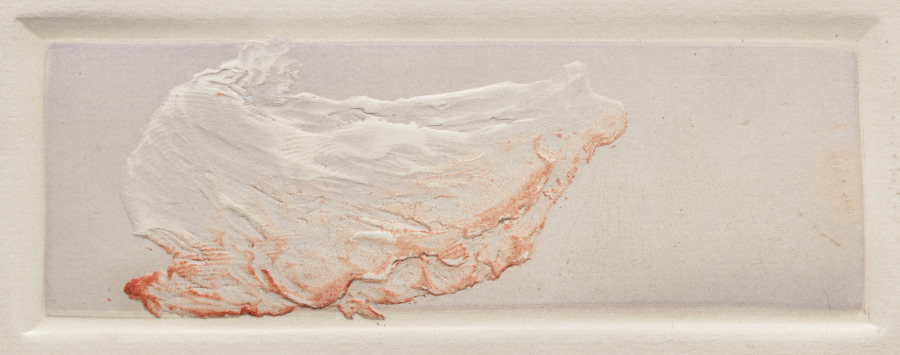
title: Dancing Woman Slightly Crouched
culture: France, early 20th Century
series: La Loïe Fuller, by Roger Marx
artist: Pierre Roche (French, 1855–1922)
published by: Les Cents Bibliophiles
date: 1904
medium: gypsograph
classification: Bound Volume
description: Although best known as a sculptor, Roche was a versatile and prolific artist who worked in many mediums. Loïe Fuller, the pioneer of modern dance who took Paris by storm in 1892, was one of his favorite subjects. He portrayed her in clay, bronze, marble, plaster, and in a series of gypsographs that illustrated an essay by the art critic Roger Marx. The book was described as "a precious monument to Loïe Fuller."